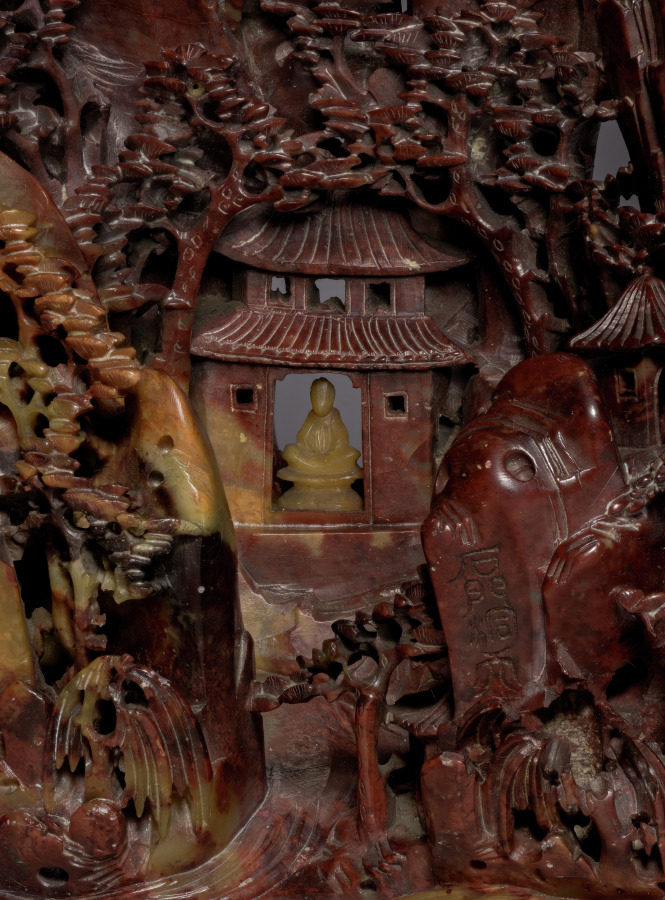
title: Landscape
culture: China, Qing dynasty (1644-1911)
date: 1644–1911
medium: soapstone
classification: Stone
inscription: 石門洞天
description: A mountain scenery surrounded by water and fish is meticulously carved out of soapstone, with a pond, bridge, waterfall, and temple front in its center. The unidentified figure scene on the left includes an ox and a man wearing what appears to be a Korean hat. A Buddha figure hidden in the depth of the temple can be glimpsed from the backside. The inscribed pillar on the right reads “Stonegate Cave to Heaven (shimen dongtian)”. Indentations all over the stone suggest that the miniature mountain was once adorned with precious stones and metal, presumably representing an earthly paradise to which one could escape in one’s mind and imagination.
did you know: A waterfall plummets down the cliff by the temple and then flows smoothly down to join the river at the front of the landscape scene.